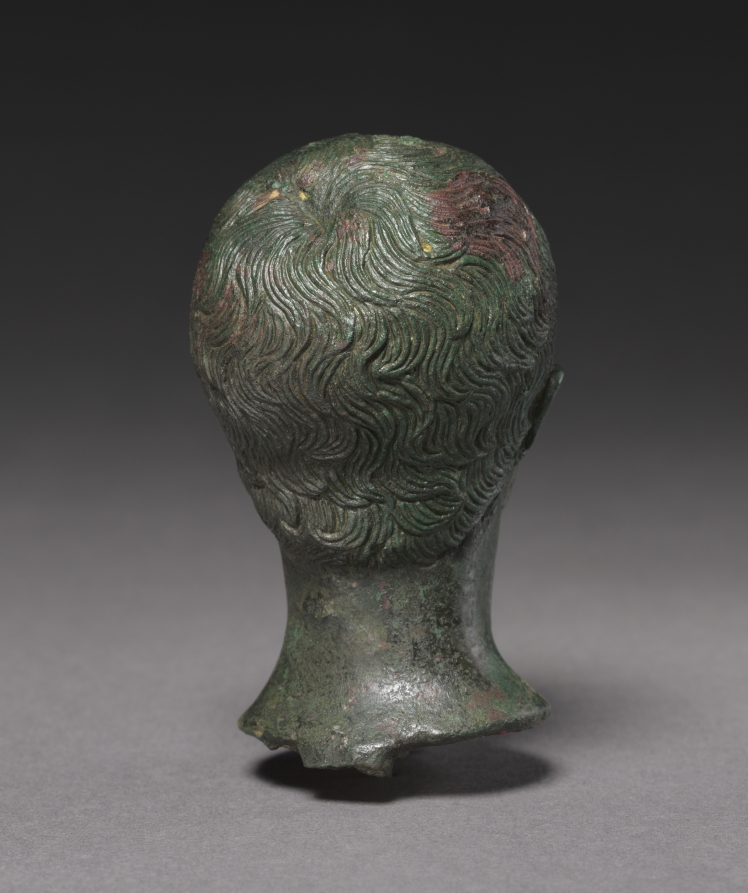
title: Portrait of a Young Girl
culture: Italy, Eastern Roman Empire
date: c. 25–30 CE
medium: bronze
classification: Sculpture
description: This bronze portrait has a boyish close-cropped hairstyle and rounded forehead. The irises of the eyes are now hollow but were once inlaid with material, possibly glass. The head was likely set into a body or bust and placed inside a tomb. This portrait head is distinctive for the particular arrangement of the comma-shaped locks of hair, which resembles portraiture during the later period of the reign of Tiberius (AD 25–30), a Julio-Claudian emperor. Some scholars believe that the earrings identify the figure as an Armenian prince, while others believe this to be a portrait of a young girl.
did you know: The earrings this young girl wears are similar to a pair in the CMA collection (1985.174).